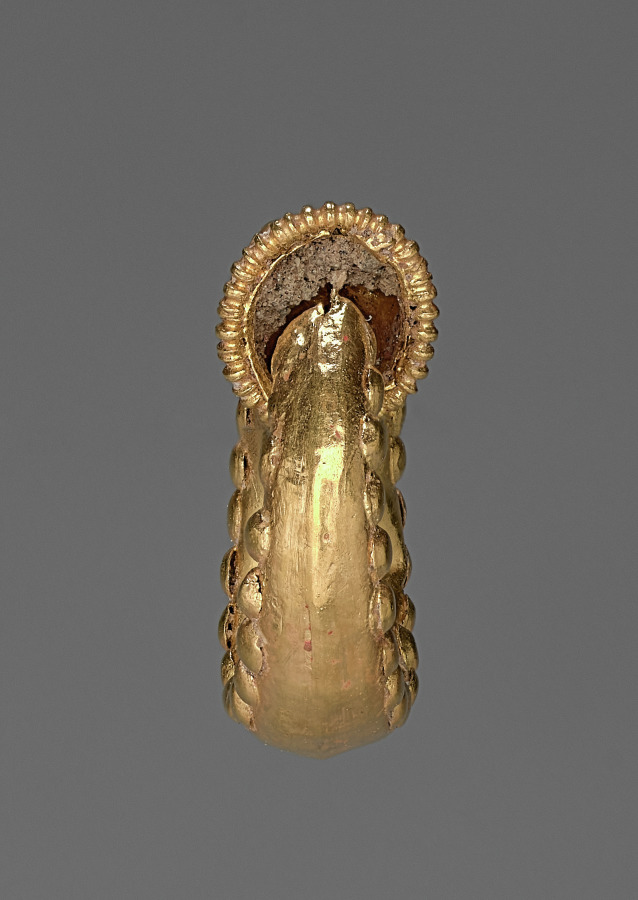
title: Earring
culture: Etruscan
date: 300s BCE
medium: gold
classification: Jewelry